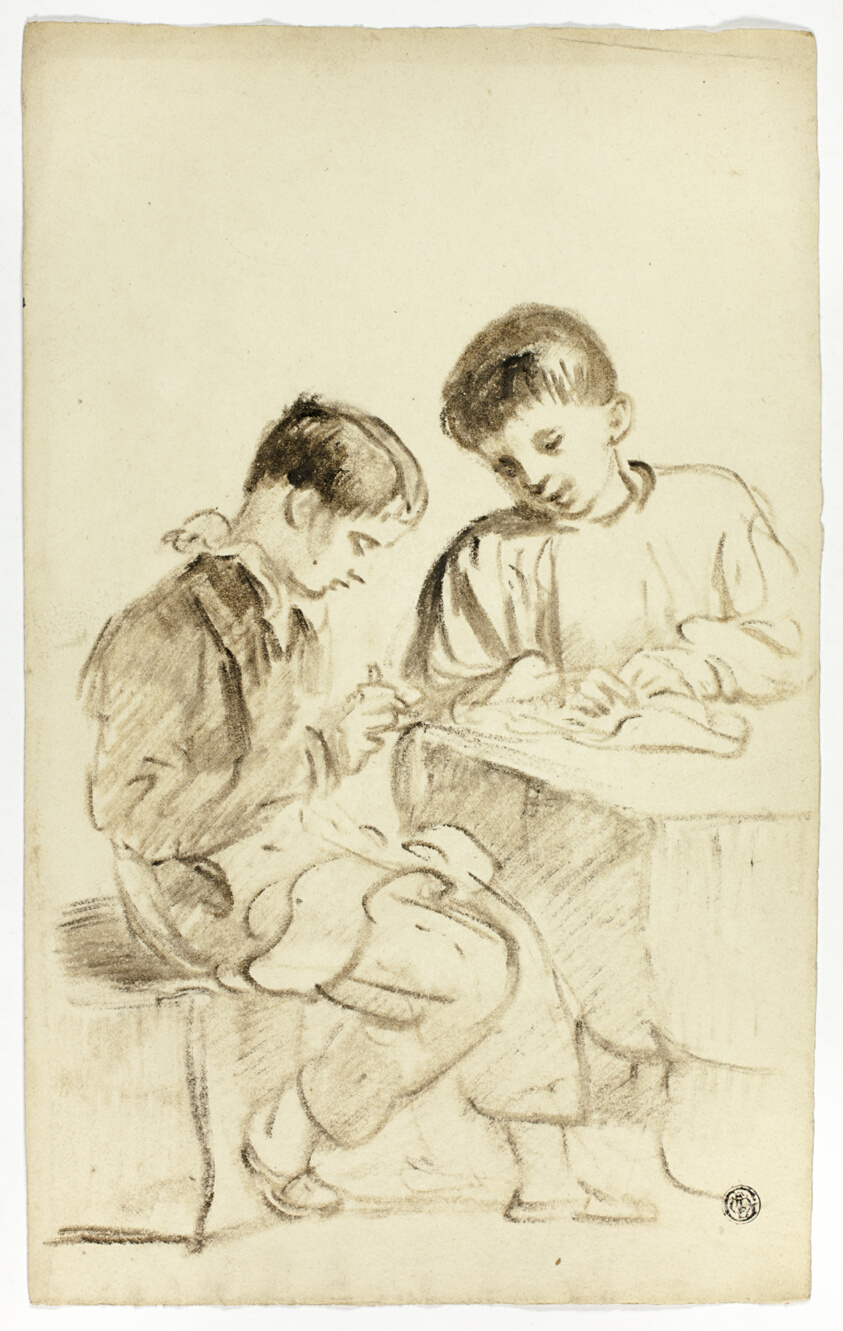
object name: Drawing and Watercolor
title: Two School Boys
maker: Thomas Jones Barker (English, 1815-1882); or Thomas Barker (English, 1769-1847)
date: c. 1830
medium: Bistre crayon on cream wove paper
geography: England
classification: drawings (visual works); crayon; paper; prints and drawing